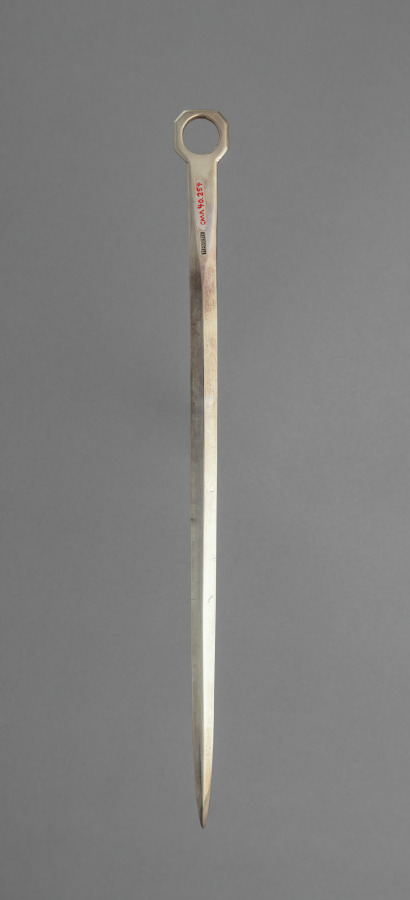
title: Skewer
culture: Europe, late 19th - early 20th century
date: late 1800s - early 1900s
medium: silver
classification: Silver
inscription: engraved "M" in script just below ring at end.